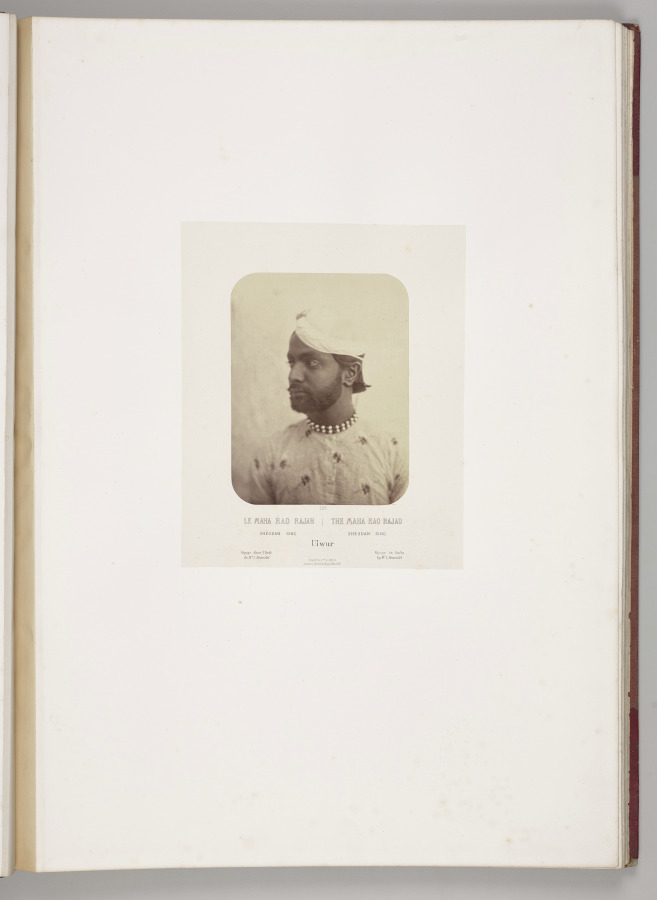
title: The Maha Rao Rajad, Sheodan Sing, Ulwur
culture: France, 19th century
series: India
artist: Louis-Théophile Marie Rousselet (French, 1845–1929)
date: 1865–68, published 1869–70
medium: Albumen print from glass plate negative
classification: Photograph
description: Concerned that his drawings did not do justice to the splendor of India’s monuments, Rousselet learned photography in India that year, a remarkable accomplishment. He proved to be a talented photographer with a sophisticated sense of composition. The scenes in this volume sweep across sites of Sultanate, Rajput, and Mughal power in northern India, from the sacred Hindu city of Varanasi on the Ganges River to Alwar in Rajasthan. Also included are several scenes of industry and portraits of Indian rulers.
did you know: Louis Rousselet described himself as a “scientific traveler” when he went to India alone at age 18 in 1863 and stayed into 1868.